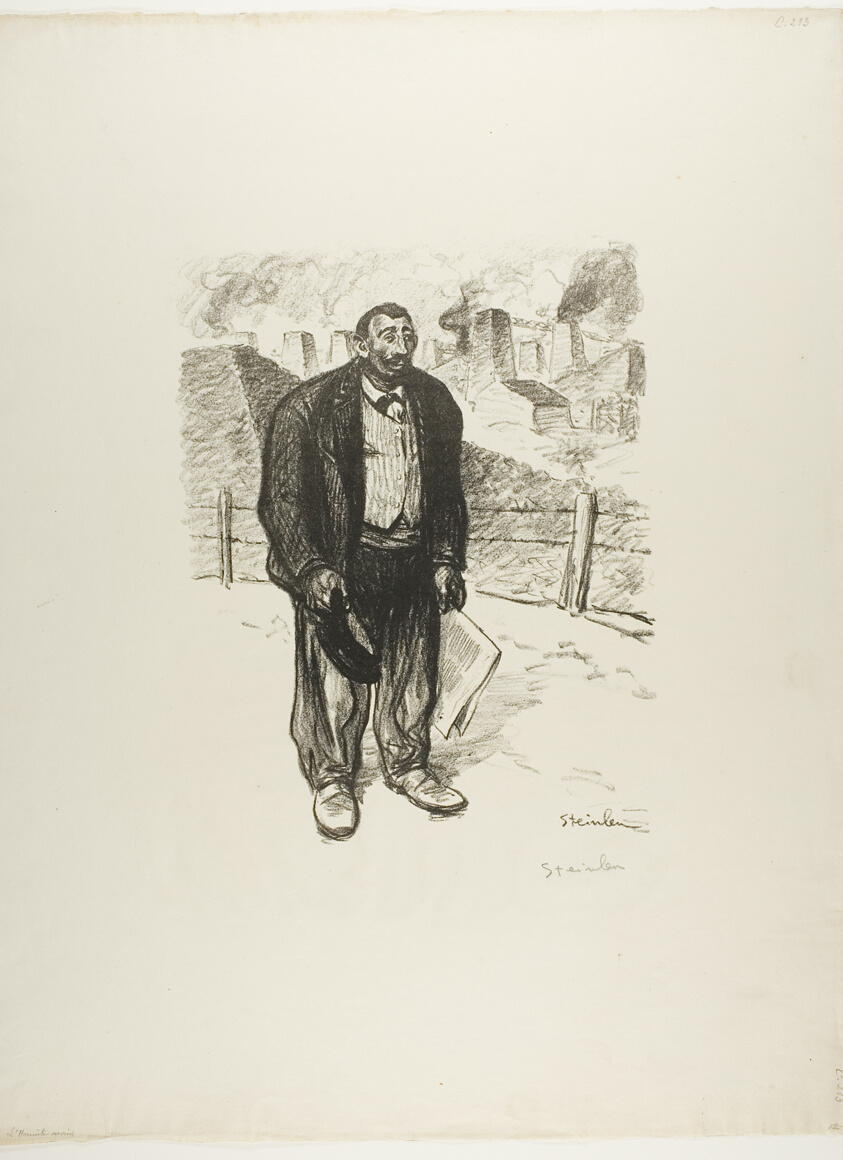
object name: Print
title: Honest Worker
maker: Théophile-Alexandre Steinlen; French, born Switzerland, 1859-1923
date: February 1899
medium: Lithograph in black on ivory wove paper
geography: France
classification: lithograph; print; prints and drawing